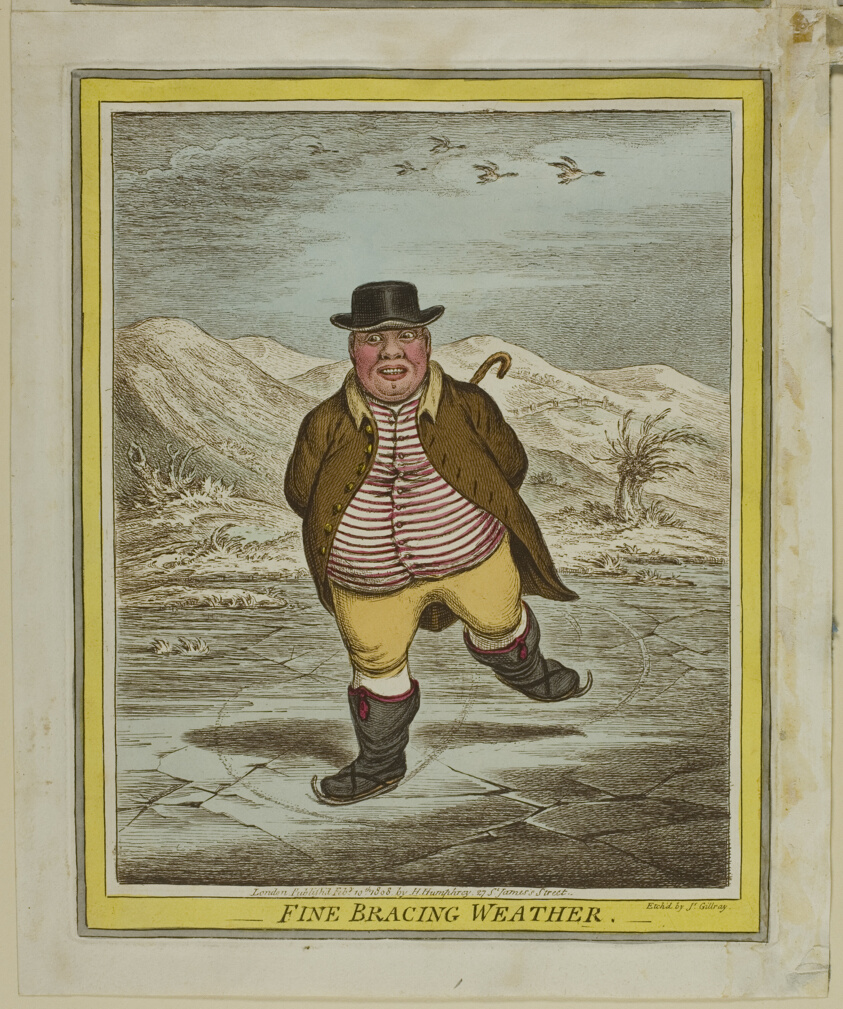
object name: Print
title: Fine Bracing Weather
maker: James Gillray (English, 1756-1815); published by Hannah Humphrey (English, c. 1745-1818)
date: published February 10, 1808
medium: Hand-colored etching on paper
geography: England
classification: etching; print; prints and drawing